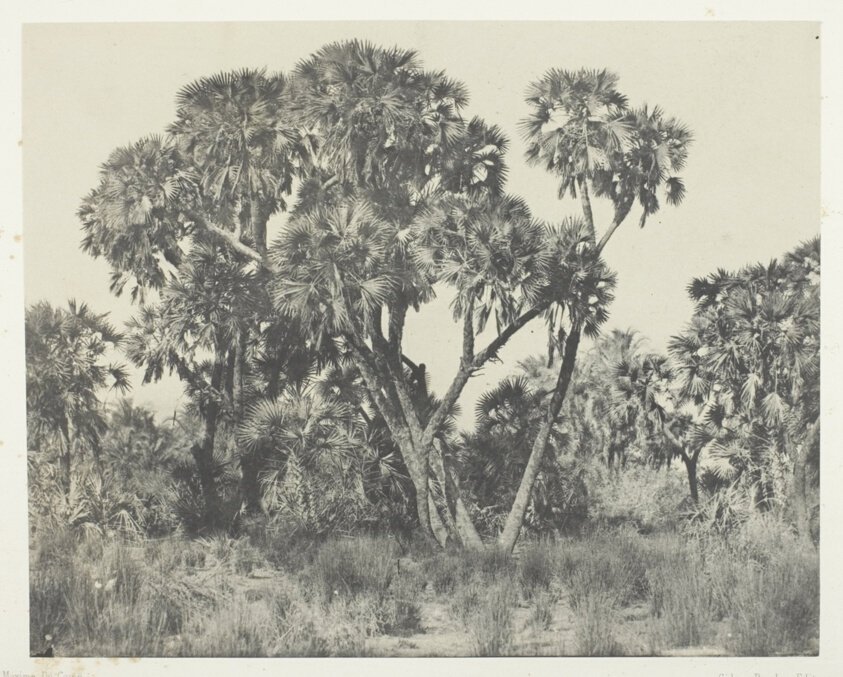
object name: Photograph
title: Palmiers Doums, Haute-Egypte, plate 22 from the album "Egypte, Nubie, Palestine et Syrie" (1852)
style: 19th century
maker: Maxime Du Camp (French, 1822–1894)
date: 1849/51, printed 1852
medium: Salted paper print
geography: France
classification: salted paper print; photographic process; photography; photograph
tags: Collected by Hugh Edwards, Egypte, Nubie, Palestine et Syrie